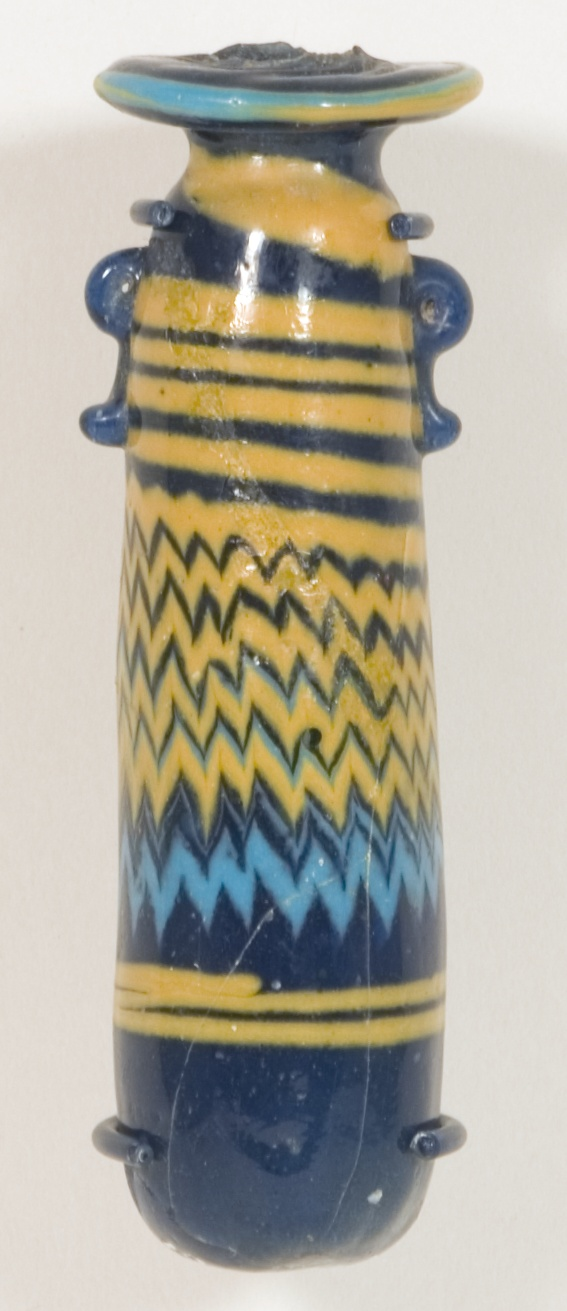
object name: Vessel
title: Alabastron (Container for Scented Oil)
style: late period (egyptian)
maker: Eastern Mediterranean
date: late 6th-early 3rd century BCE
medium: Glass, core-formed technique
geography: Eastern Mediterranean Region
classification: container; alabastron; glass; vessel; ancient art